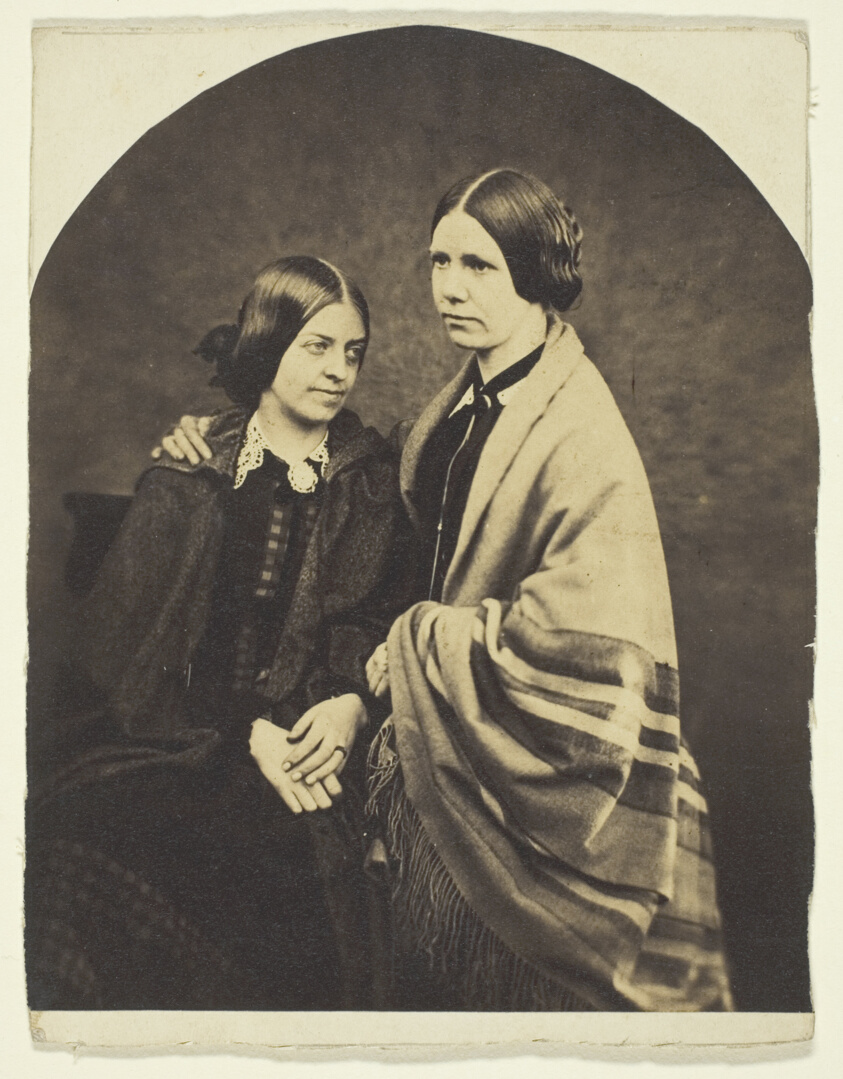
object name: Photograph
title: Mrs. Craik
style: 19th century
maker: Artist unknown, possibly Benjamin Mulock (English, 1829–1863); English, 19th century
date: 1848/60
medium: Calotype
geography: England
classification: photographic process; photography; photograph